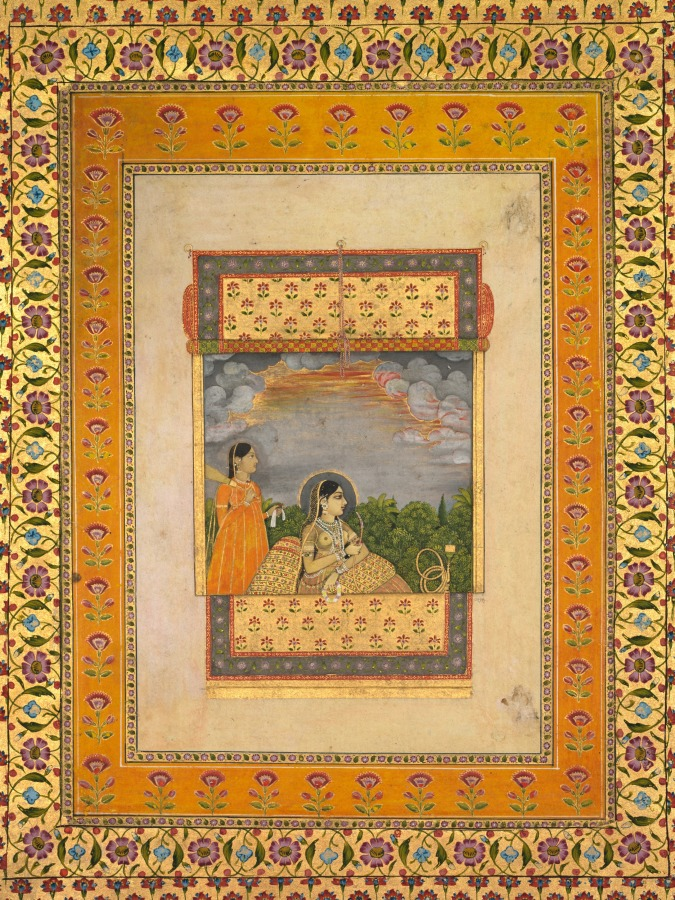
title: Princess and attendant in trompe l’oeil window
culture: Mughal India, Uttar Pradesh, Lucknow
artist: Aqil Khan (Indian, active mid-1700s)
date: c. 1765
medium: Gum tempera, ink, and gold on paper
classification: Painting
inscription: 'amal 'Aqil Khān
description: A golden window shade has been rolled up to reveal a princess seated on a terrace. The carpet draped over the sill echoes that of the balcony rail where royals would show themselves to the public. Rather than taking the view of an outsider, the viewer looks from inside the palace out to the women and the wooded landscape beyond. During the mid-1600s, the Mughal court introduced a preference for the patterns on carpets and textiles: flowering plants on a plain ground. This influential fashion derived from their appreciation of European botanical studies that merchants and diplomats brought to India.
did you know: Unlike in portraits of the emperor, women sit on the outside of the royal window.